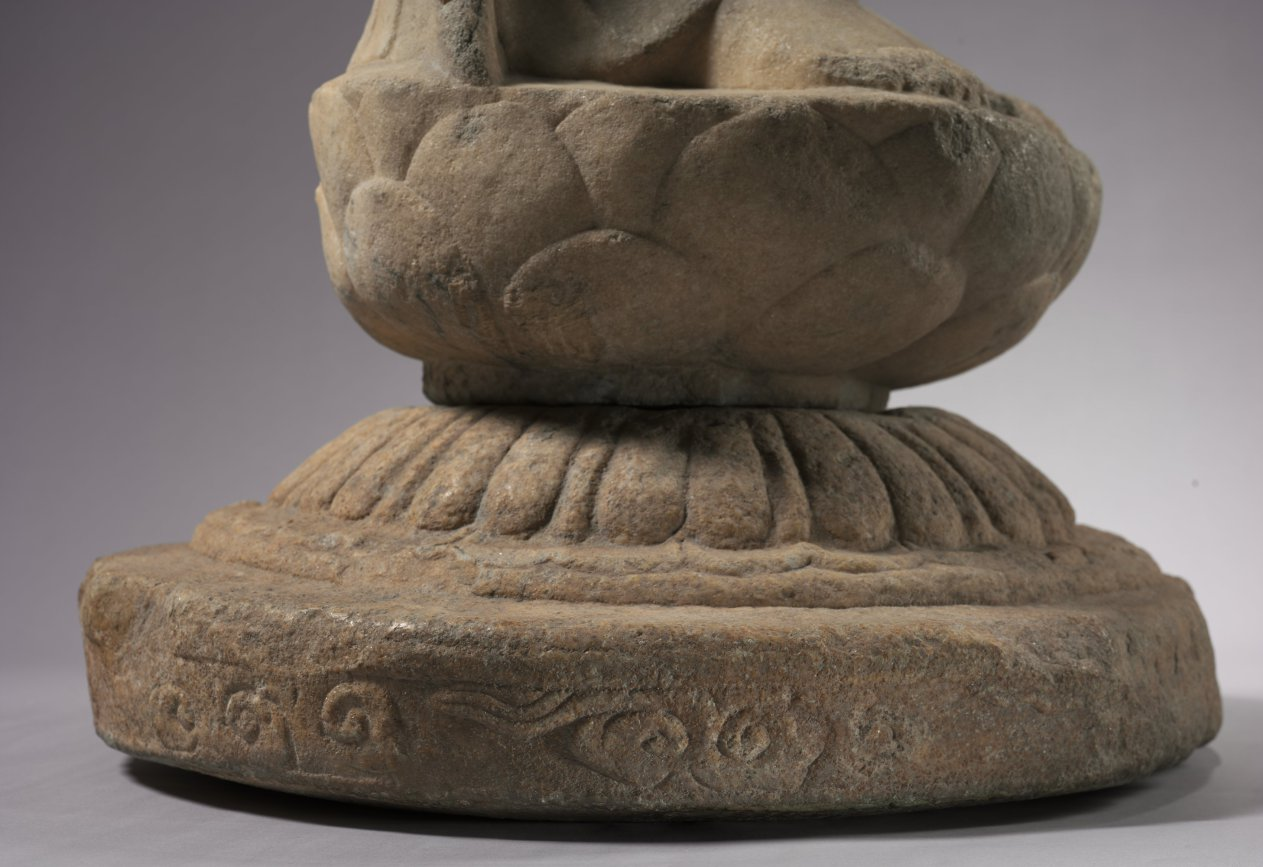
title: Bodhisattva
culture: China, Hebei province, Tang dynasty (618-907)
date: 700s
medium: white marble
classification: Sculpture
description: The bodhisattva is an enlightened being dedicated to the spiritual awakening of all beings. This white marble torso exemplifies the quest for refinement and plasticity of form that mark the golden era of Tang Chinese Buddhist sculpture. The statue was conceived with great power and grandeur. The slight sway of the hip on one side and upraised shoulder on the other result in an elegant S-curve. Emphatic lines cut into the stone create a sense of rhythm and reveal the sculptor’s skill and sureness of execution.